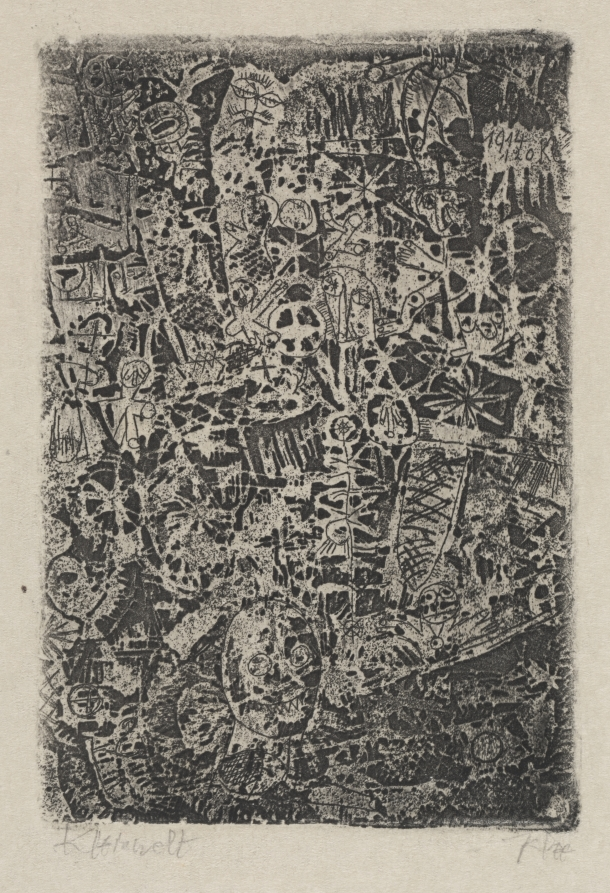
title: Small World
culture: Germany, 20th century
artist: Paul Klee (German, 1879–1940)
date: 1914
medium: etching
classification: Print